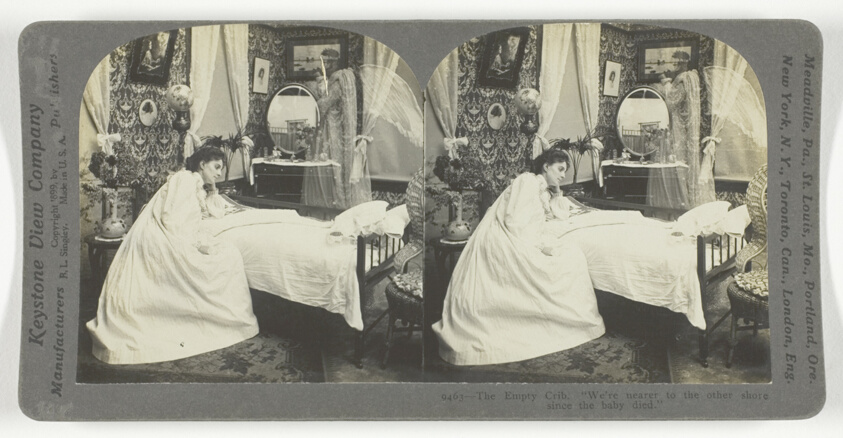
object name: Photograph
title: The Empty Crib. "We're nearer to the other shore since the baby died"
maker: Keystone View Company; American, 1892-1963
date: 1899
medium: Albumen print, stereo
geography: Saint Louis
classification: photography; photograph; albumen silver print; stereograph (albumen)